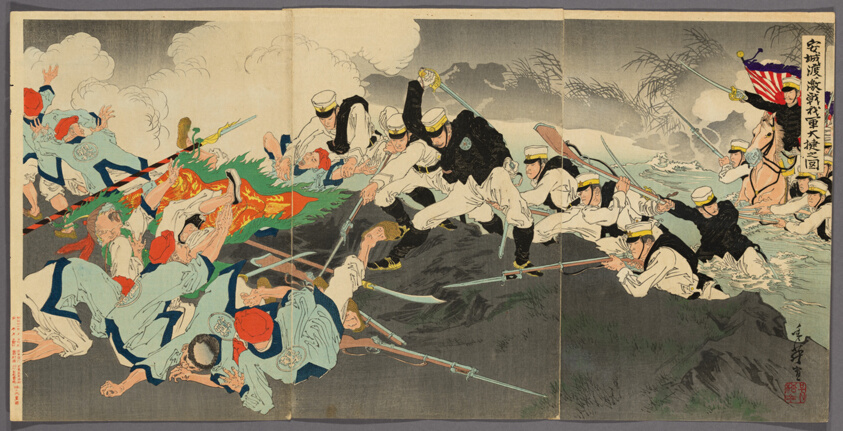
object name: Print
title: Great Victory of Our Troops at the Fierce Battle of the Ansong Ford (Anjo no watashi waga gun taisho no zu)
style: Japanese (culture or style)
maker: Migita Toshihide (Japanese, 1863-1925)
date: 1894/95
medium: Color woodblock print; oban triptych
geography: Japan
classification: woodblock print; print